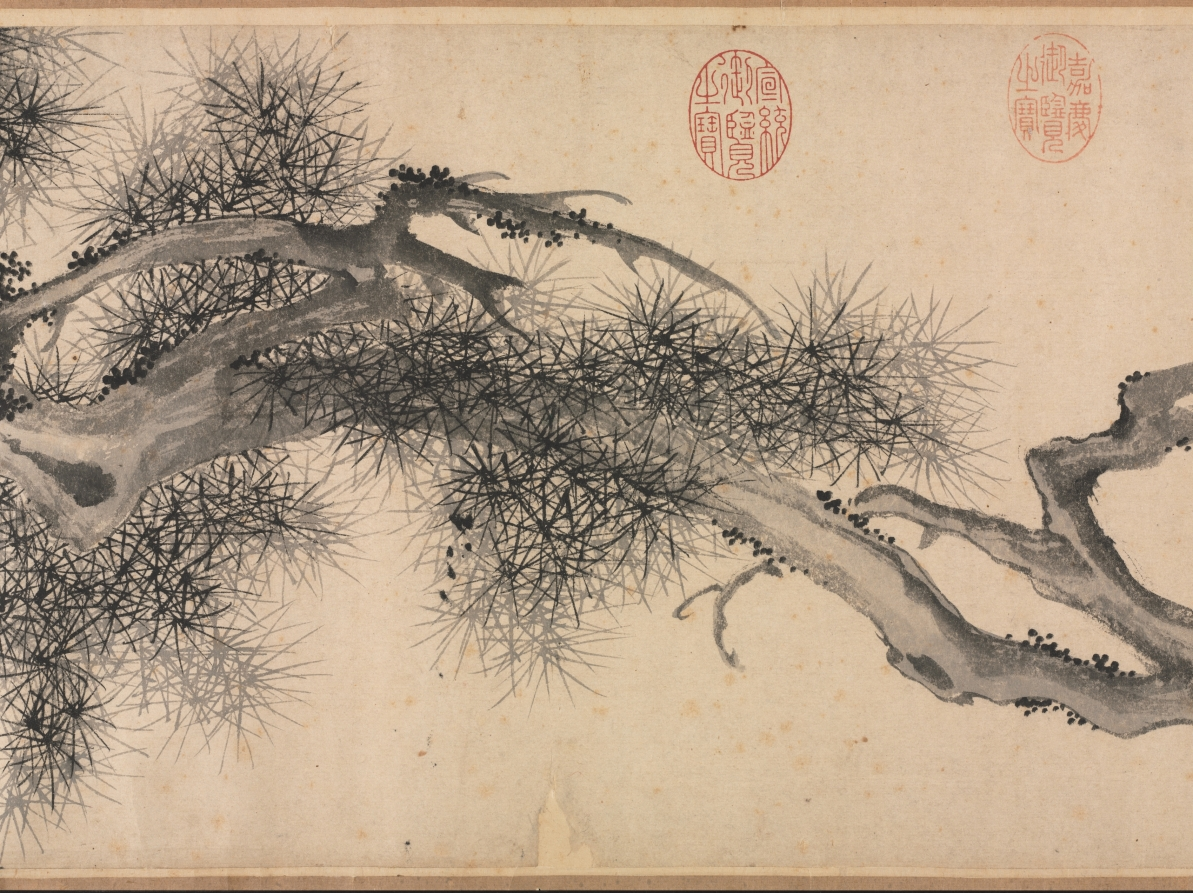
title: Old Pine Tree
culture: China, Ming dynasty (1368–1644)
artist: Wen Zhengming (Chinese, 1470–1559)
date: late 1530s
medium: handscroll; ink on paper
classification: Painting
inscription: 變化勢難縛，虬髯似戟森. 徵明 [印]文徵明印; 衡山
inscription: 2 partial seals of Qian Shisheng 錢士昇 (1575–1652)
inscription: 8 imperial seals: 6 of the Qianlong emperor (r. 1736–95); 1 of the Jiaqing emperor (r. 1796–1821); 1 of the Xuantong emperor (r. 1909–11).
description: Here the natural appearance of a gnarled and vine-entangled pine has been transformed into a rhythmic abstraction of brushstrokes and ink tonalities, with unifying opposites—opening and closing, rising and falling—that provide the design across the horizontal scroll. The artist's inscription reads: "The force of change beyond restraint; / The dragon's whiskers are likened to a forest of spears."